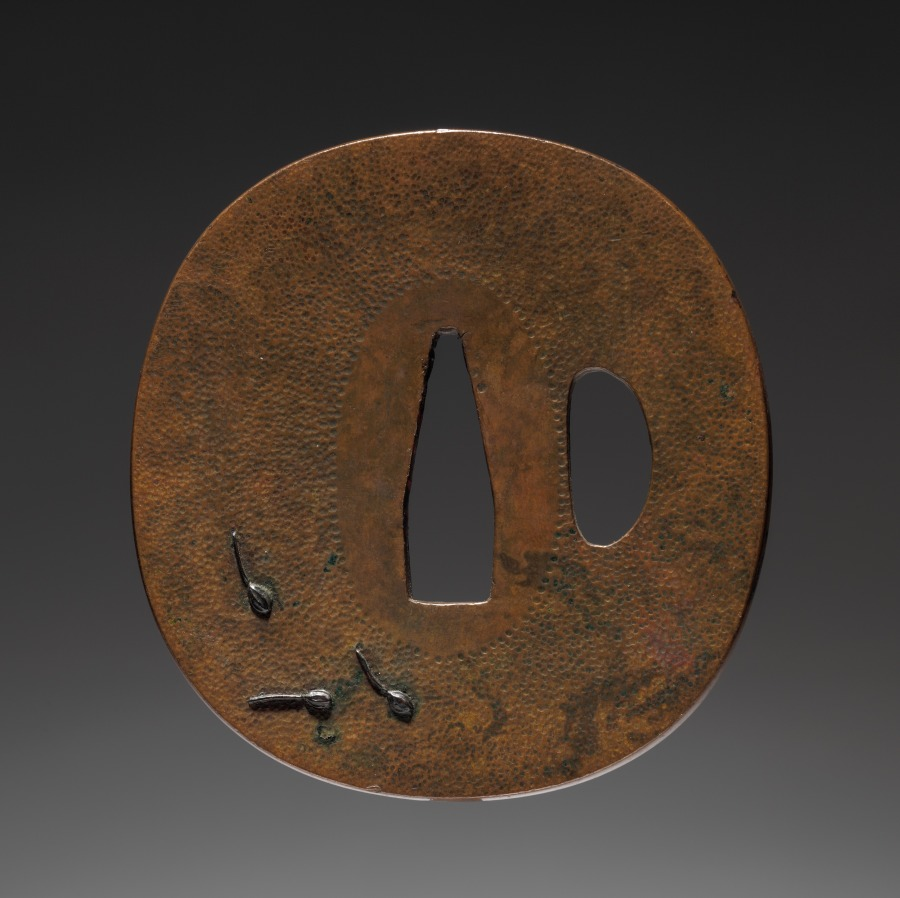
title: Sword Guard (Tsuba) with Mice and Rice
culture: Japan, possibly Edo period (1615-1868)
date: c. 1615–1868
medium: bronze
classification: Arms and Armor